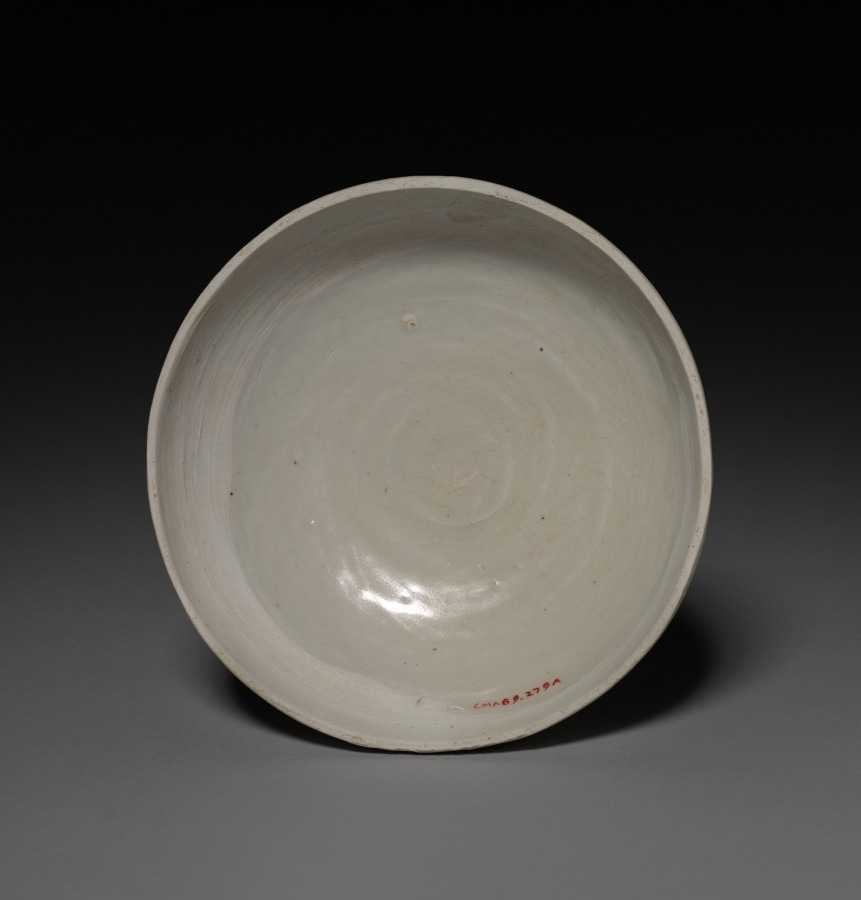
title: Round Covered Box with Floral Scrolls in Relief: Qingbai type Ware (lid)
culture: China, Fujian province, Anxi xian, Yuan dynasty (1271-1368)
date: 1300s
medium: glazed porcelain with slip decoration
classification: Ceramic